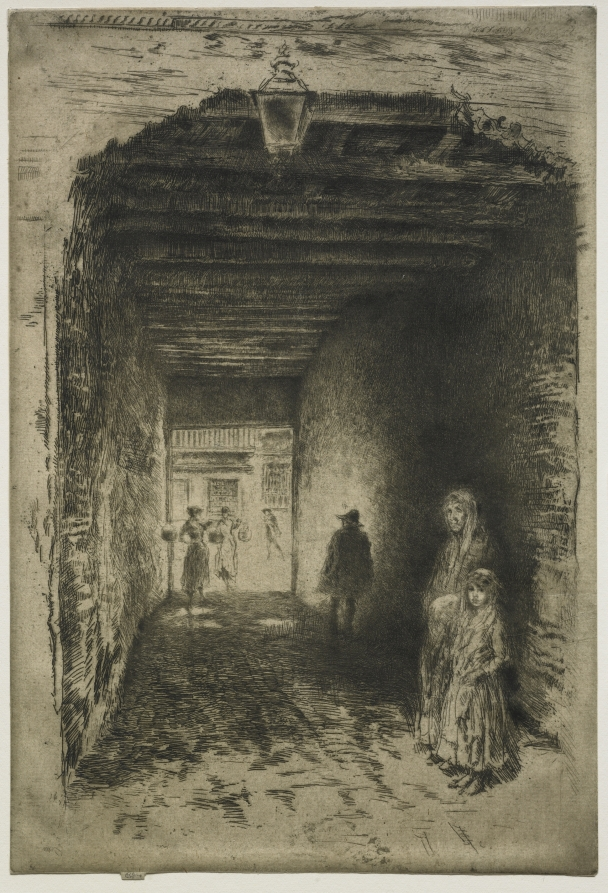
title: The Beggars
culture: America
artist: James McNeill Whistler (American, 1834–1903)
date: 1880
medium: etching and drypoint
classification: Print